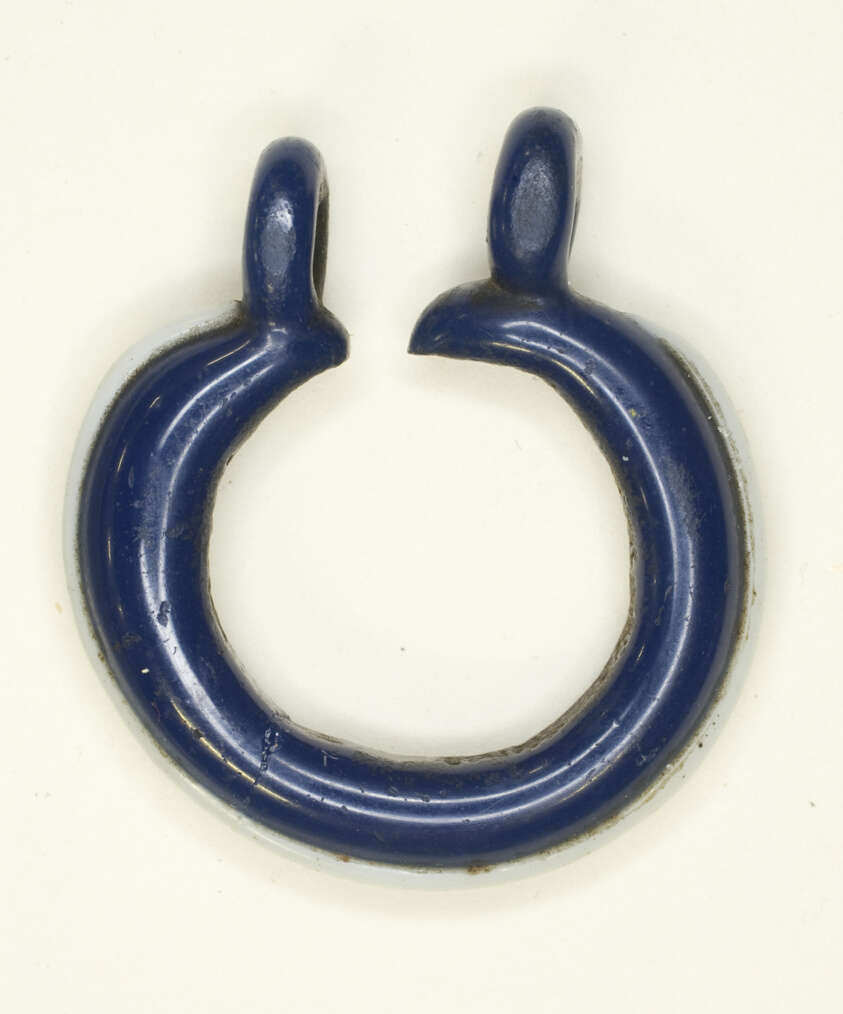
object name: Costume and Accessories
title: Earring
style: new kingdom, egyptian, ancient, eighteenth dynasty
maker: Egyptian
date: New Kingdom, mid- to late Dynasty 18, about 1400–1295 BCE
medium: Glass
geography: Egypt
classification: jewelry; glass; ancient art; costume; ear ornament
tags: jewelry, beauty